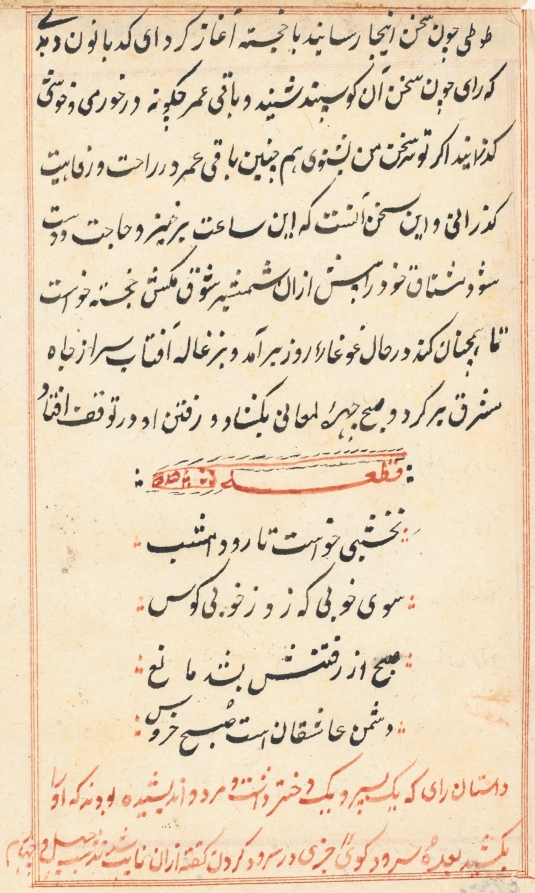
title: Page from Tales of a Parrot (Tuti-nama): text page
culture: Mughal India, court of Akbar (reigned 1556–1605)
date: c. 1560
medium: gum tempera, ink, and gold on paper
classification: Painting